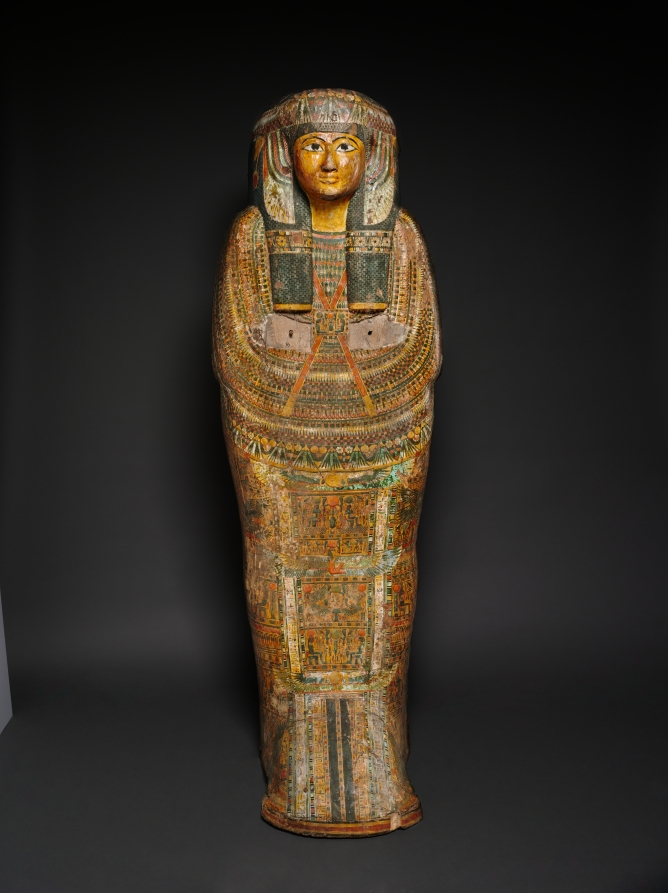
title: Coffin of Nesykhonsu (lid)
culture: Egypt, Third Intermediate (1069–715 BCE), Dynasties 21–22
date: c. 976–889 BCE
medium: gessoed and painted sycamore fig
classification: Funerary Equipment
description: A complete set of coffins during the late New Kingdom and Third Intermediate Period consisted of an outer and inner coffin and a mummy board (essentially a lid without a case, placed directly over the wrapped mummy). Judging by its size, this must have been Nesykhonsu's outer coffin. The type is essentially the same as the coffin of Bakenmut, which was also an outer coffin. The two coffins are said to have been found together and to have belonged to a man and wife. This is quite possible, although the inscriptions do not bear it out. Bakenmut is not mentioned on Nesykhonsu's coffin, nor is she mentioned on his. There was by this time a tremendous repertoire of scenes appropriate for coffin decoration. Whereas Bakenmut's coffin features images of deified dead pharaohs, Nesykhonsu's is decorated in a more personal way with scenes from her own funeral. The main scene in the interior (near the top) shows a priest clad in a panther skin with the mummy of Nesykhonsu behind. The god appears in mummy form and wears a sun disk on his head. The scarab beetle inside the sun disk identifies him as Khepri, the morning sun, and the hieroglyphs to the right identify him as Atum, the evening sun. Taken together, image and text represent the sun god in both his rising and setting, youthful and aged aspects.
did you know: Two of Nesykhonsu's titles, "Lady of the House" and "Singer of the Choir of Mut the Great," are written on the outside of the coffin.